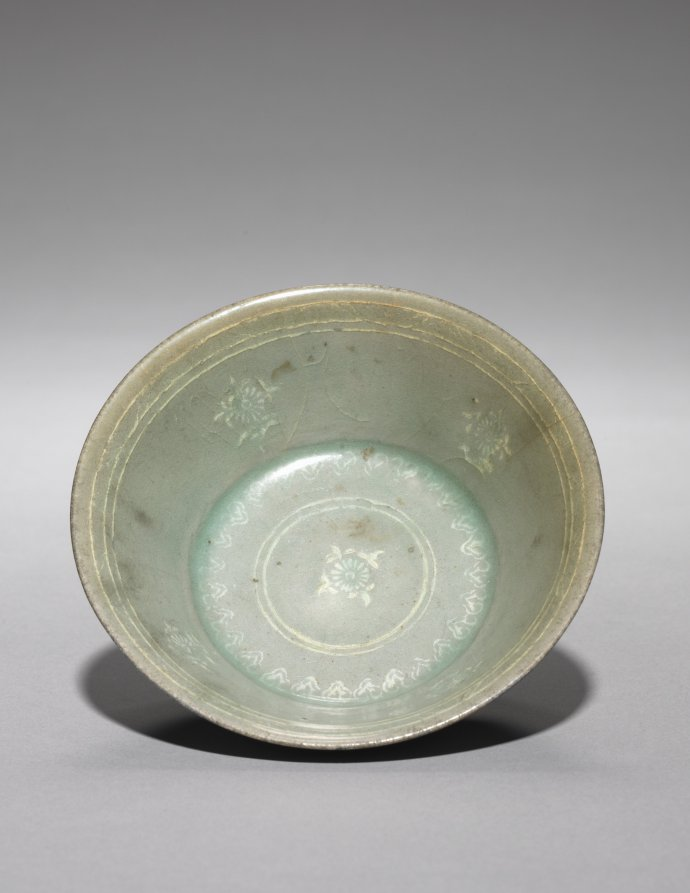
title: Saucer with Inlaid Chrysanthemum Design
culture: Korea, Goryeo dynasty (918–1392)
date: 1200s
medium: pottery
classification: Ceramic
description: During the Goryeo period (918–1392), about 260 kilns operated in mainly Jeolla and Chungcheong provinces, meeting a high consumer demand. Celadon wares for everyday use such as this dish were among the most common burial objects in elites' tombs. Furnishing tombs with an elaborate assemblage of objects was believed to honor and comfort the newly dead. Generally, Goryeo tombs were left untouched until the late 19th century. During the colonial period (1910–45), however, Japanese archaeologists competitively excavated the tombs located in Kaeseong, the former capital of the Goryeo period, and these wares soon became available for Japanese and Western collectors.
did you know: On the base of this tea bowl, three small spur marks made of bits of clay remain visible, indicating an individual protective casing of fire clay (saggar).